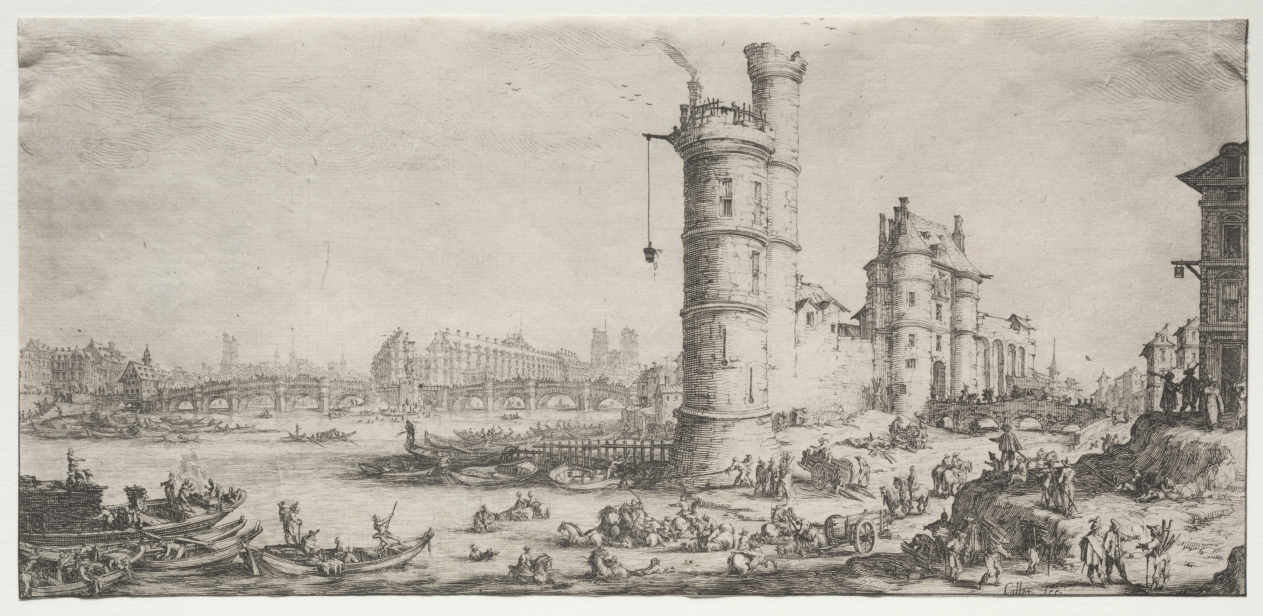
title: Les deux grandes vues de Paris: Vue du Pont Neuf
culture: France, 17th century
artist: Jacques Callot (French, 1592–1635)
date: 1628–1630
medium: etching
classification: Print